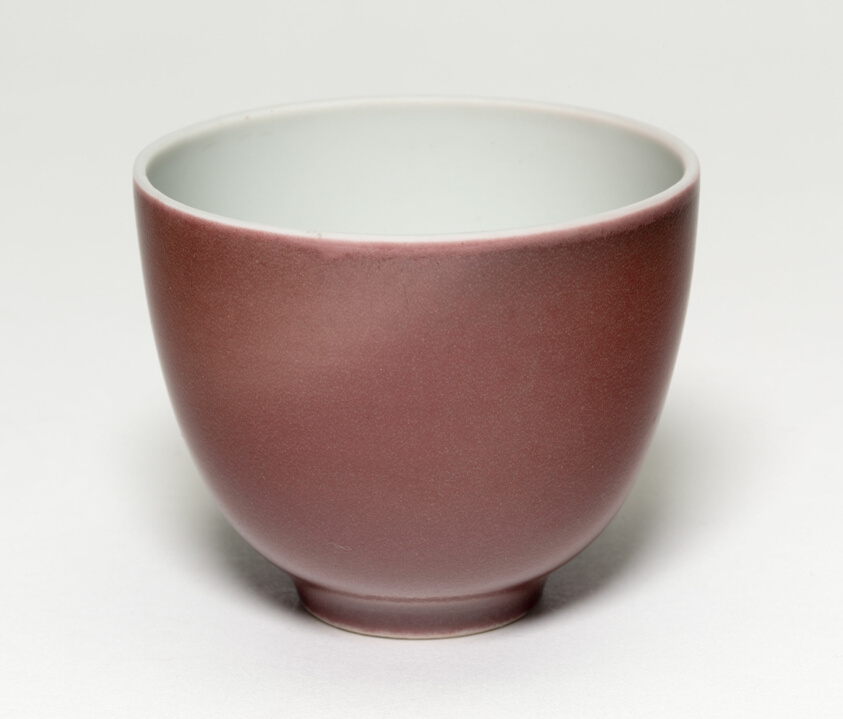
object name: Vessel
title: Cup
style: Chinese (culture or style)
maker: China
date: Qing dynasty (1644–1911), Yongzheng reign mark and period (1723–1735)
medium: Porcelain with crimson pink glaze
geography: China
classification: drinking vessel; porcelain; asian art; ceramics; vessel